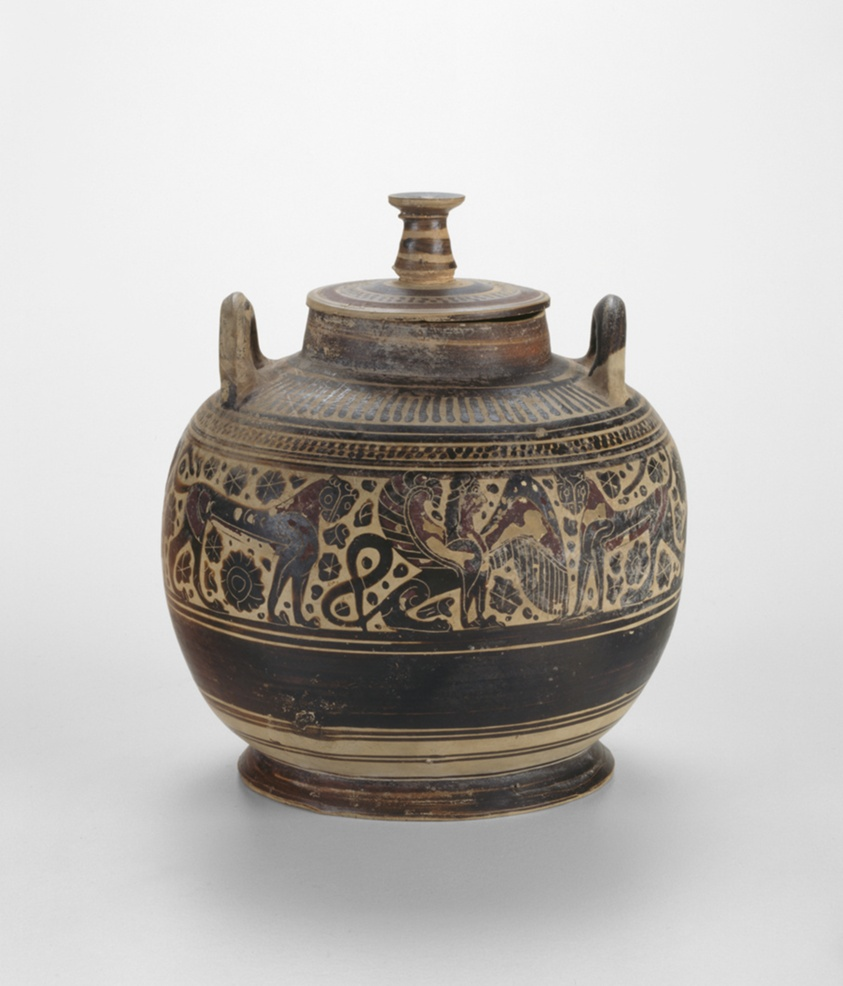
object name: Vessel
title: Pyxis (Container for Personal Objects)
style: archaic (greek), orientalizing, corinthian (pottery style), black-figure, ancient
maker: Attributed to the Ampersand Painter; Greek; Corinth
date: 580-570 BCE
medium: terracotta, black-figure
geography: Corinth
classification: earthenware; ceramics; vessel; ancient art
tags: mythology, beauty, rituals